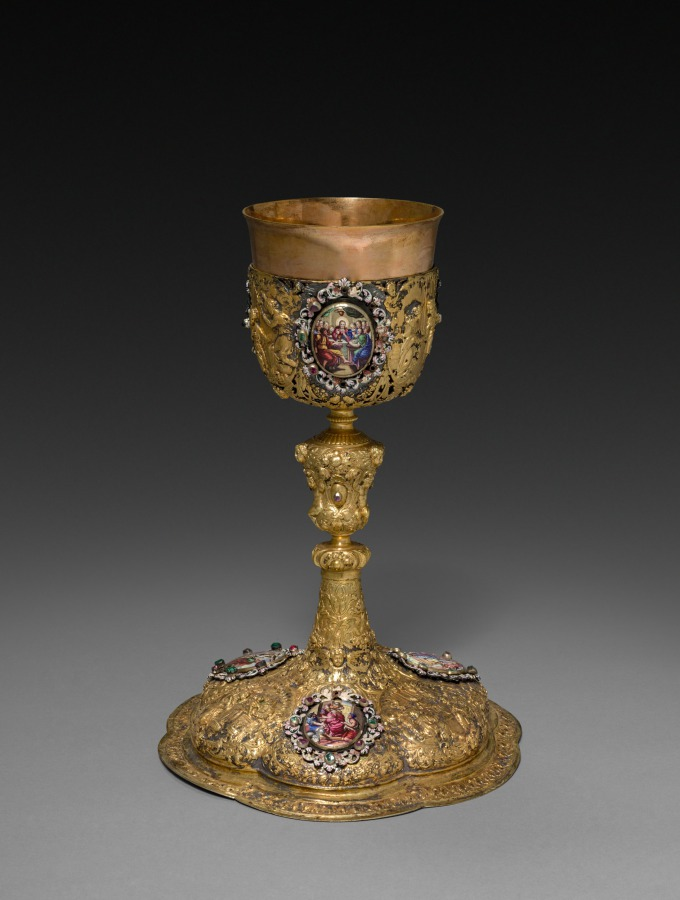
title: Chalice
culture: Switzerland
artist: Thomas Pröll (Swiss)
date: early 1700s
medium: silver gilt with polychrome painted enamels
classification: Metalwork